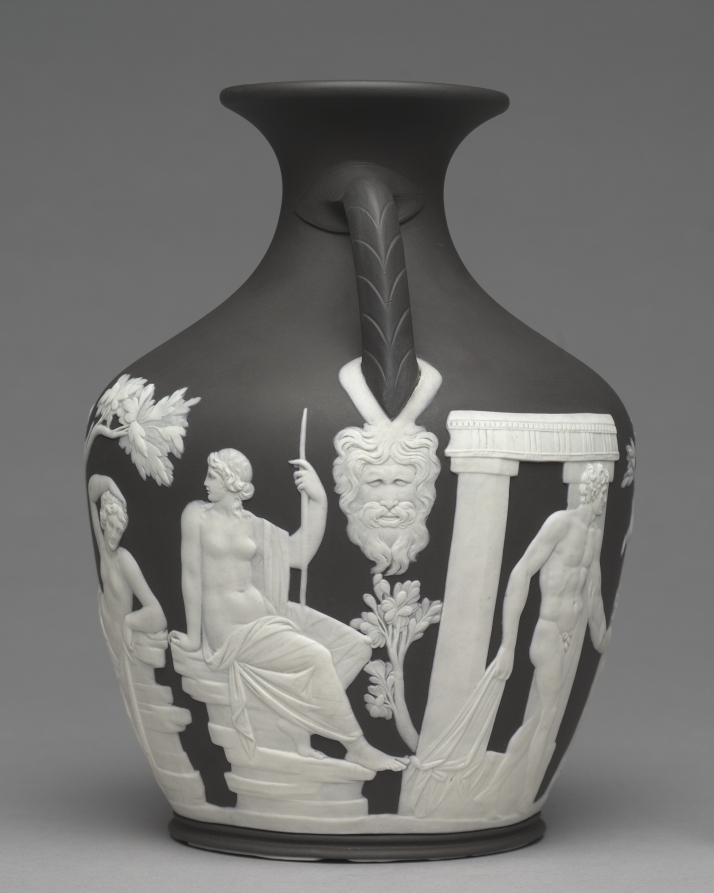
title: Portland Vase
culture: England, Staffordshire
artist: Josiah Wedgwood and Sons (Britain, Staffordshire, est. 1759)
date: c.1790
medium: jasperware with applied decoration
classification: Ceramic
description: The original Portland Vase is a Roman antiquity, made of dark-blue glass, dating from the first century AD. Such a rare archaeological find fascinated aristocratic collectors and artists alike, and eventually the vase came into the hands of the 3rd Duke of Portland in the 1780s. Around 1790 the duke lent the vase to the potter Josiah Wedgwood to make exact replicas in ceramic, of which the Cleveland example is one of the first editions. Eventually, the 4th Duke of Portland deposited the original Roman vase in the British Museum, where it resides today.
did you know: While the scene depicted here is not known for certain, many scholars believe that the Portland Vase portrays the wedding of Peleus and Thetis from Greek mythology.